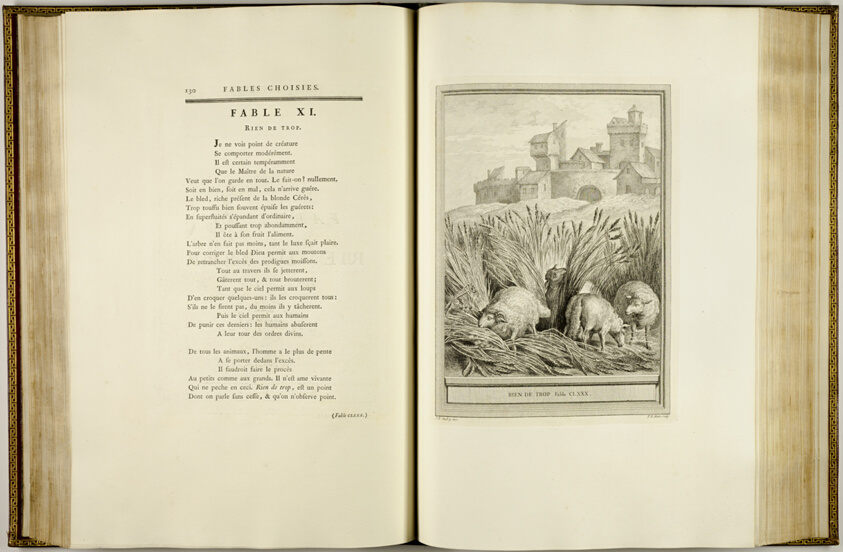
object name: Book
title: Fables choisies, mises en vers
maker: Illustrations designed by Jean-Baptiste Oudry (French, 1686-1755); written by Jean de la Fontaine (French, 1621–1695); engravings by Nicolas-Gabriel Dupuis (French, 1698–1771), Pierre François Tardieu (French, 1711–1771), René Gaillard (French, c. 1719–1790), Pierre Chenu (French, c. 1718-c. 1800), Michel Aubert (French, 1700-1757), Jean Charles Baquoy (French, 1721-1777), Pierre-Étienne Moitte (French, 1722-1780), Jean Ouvrier (French, 1725-1754), Claude Olivier Galimard (French, 1719-1774), Jean-Jacques Flipart (French, 1719-1782), Nicolas Dauphin de Beauvais (French, c. 1687-1763), Louis-Claude Legrand (French, 1723–1807), Pierre Quentin Chedel (French, 1705-1763), Pierre Aveline (French, 1702-1760), Jacques Philippe Le Bas (French, 1707–1783), Pieter Franciscus Martenisie (Flemish, 1729-1789), Laurent Cars (French, 1699-1771), Jacques-Jean Pasquier (French, 1718-1785), Johann Christoph Teucher (German, c. 1716-c. 1750), Élie du Mesnil (French, born 1726), Martin Marvie (French, 1713-1813), William Wynne Ryland (British, 1732-1783), Jacques Aliamet (French, 1726-1788), Noël Le Mire (French, 1724-1801), Louis-Simon Lempereur (French, 1728-1807), Antoine Radigues (French, 1721-1809), Per Gustaf Floding (Swedish, 1731–1791), A.J. Defehrt (French, 1723-1774), Benoît-Louis Prévost (French, 1747-c. 1804), Catherine Elisabeth Lemperuer (French, 1726-active 1780), Pierre Jacques Duret (French, b. 1729), Pierre Philippe Choffard (French, 1730-1809), J.F. Poletnich (French, active 1750-80), and Manuel Salvador Carmona (Spanish, 1734-1820); wood engravings by Nicolas Le Sueur (French, 1691–1764) after illustrations designed by Jean Jacques Bachelier (French, 1724-1806); printed by Charles-Antoine Jombert (French, 1712–1784); published by Desaint et Saillant (French, 18th century) and Durand (French, 18th century)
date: 1756–59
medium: Bound book with engravings, with etching, wood engravings and letterpress in black on ivory laid paper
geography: France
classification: book; prints and drawing